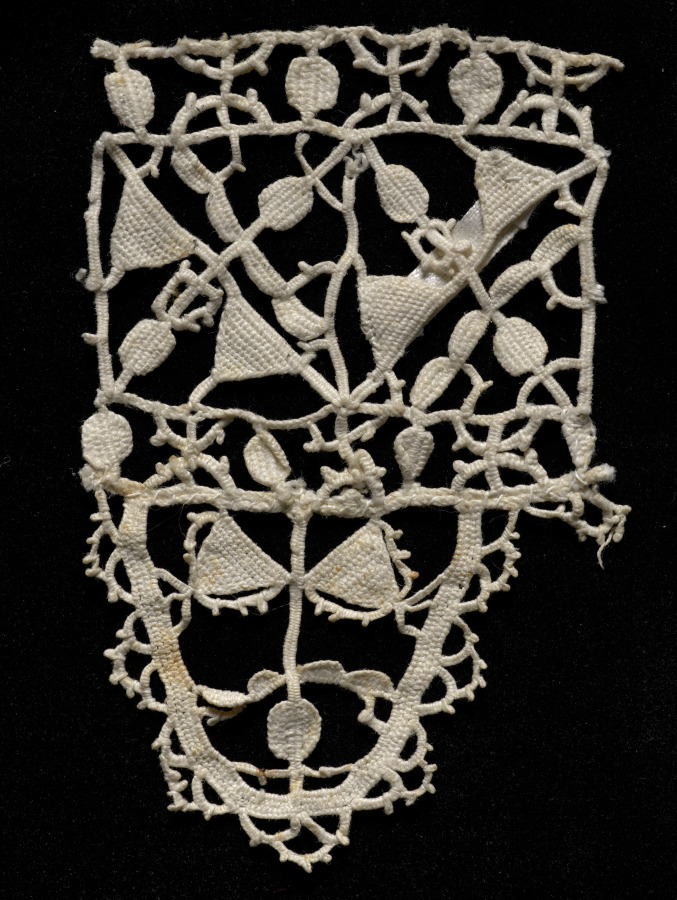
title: Lace Edging Fragment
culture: Italy, Genoa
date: 1500s–1600s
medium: Linen: needle lace (Punto in aria)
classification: Lace